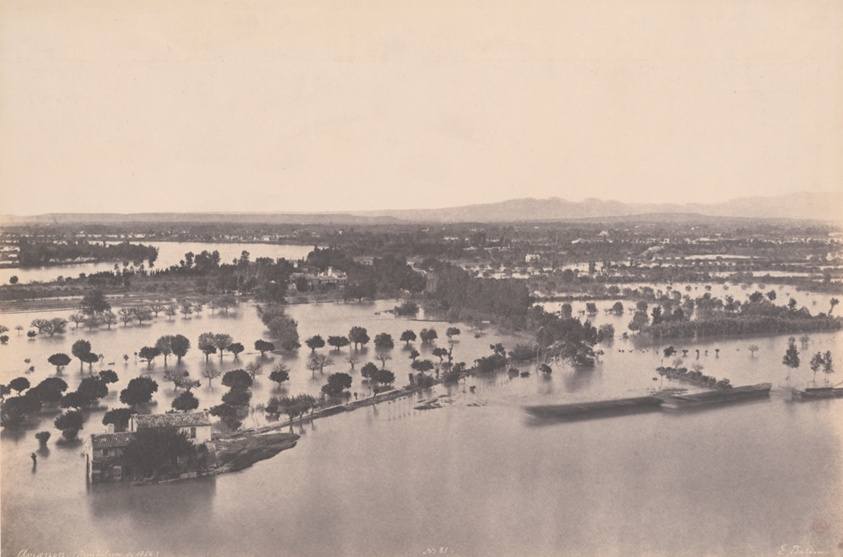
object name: Photograph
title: Avignon (Flood of 1856) (Avignon [Inondation de 1856])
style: 19th century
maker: Édouard Baldus; French, born Germany, 1813–1889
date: 1856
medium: Salted paper print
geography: France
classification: photograph; photography